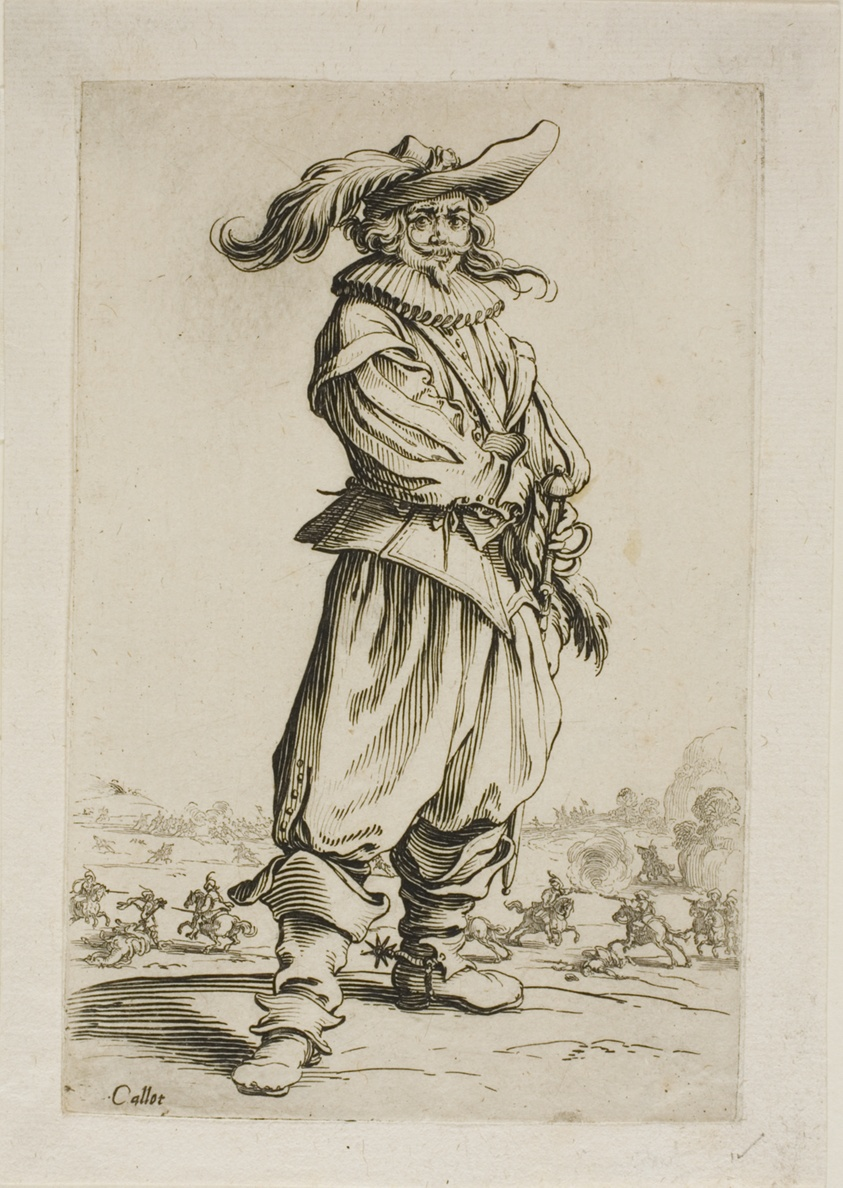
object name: Print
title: The Soldier with a Plumed Hat, plate three from La Noblesse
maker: Jacques Callot (French, 1592-1635)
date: c. 1625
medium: Etching on paper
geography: France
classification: etching; print; prints and drawing